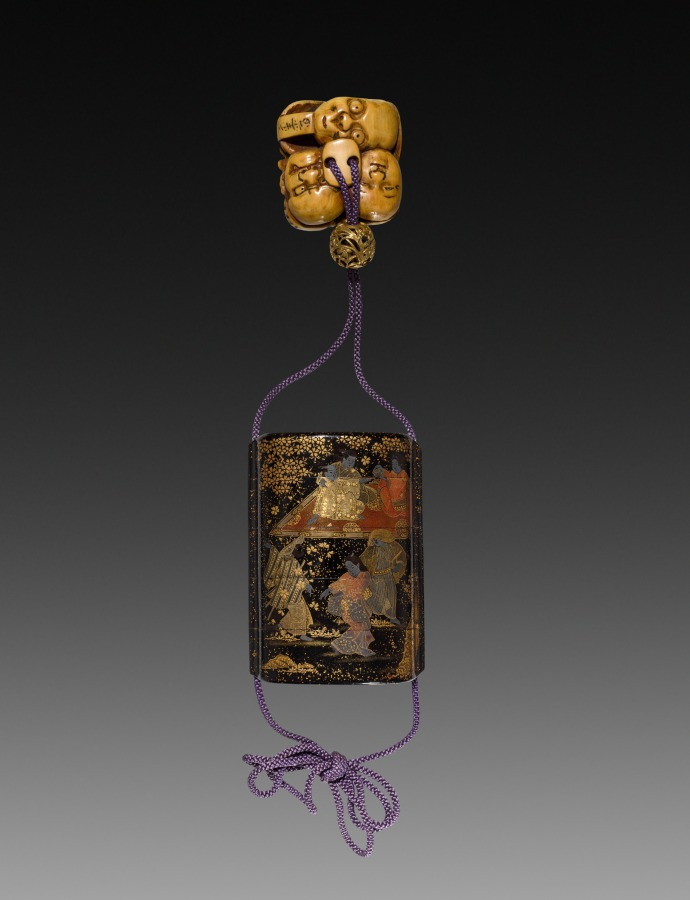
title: Inro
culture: Japan, Edo period (1615–1868)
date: early to mid-1800s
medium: lacquer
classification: Lacquer